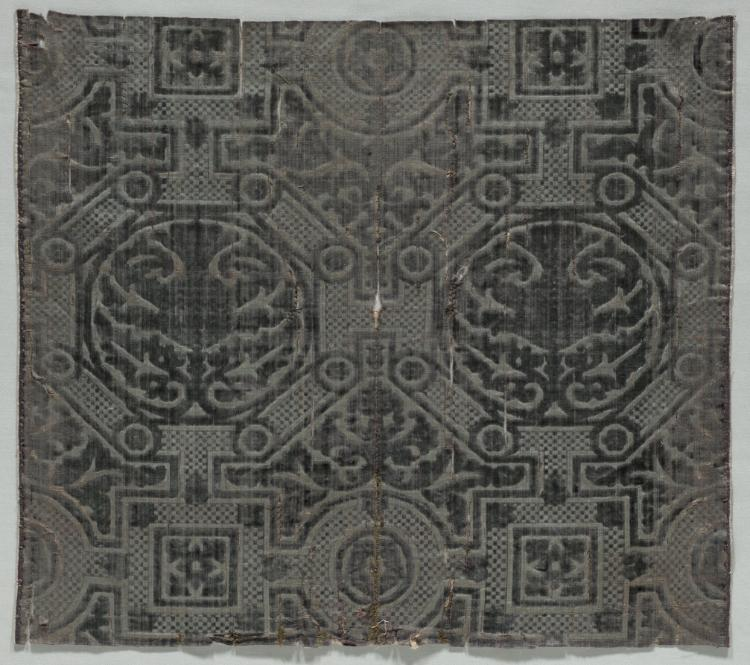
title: Velvet Textile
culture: Italy, 16th century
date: 1500s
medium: velvet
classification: Velvet